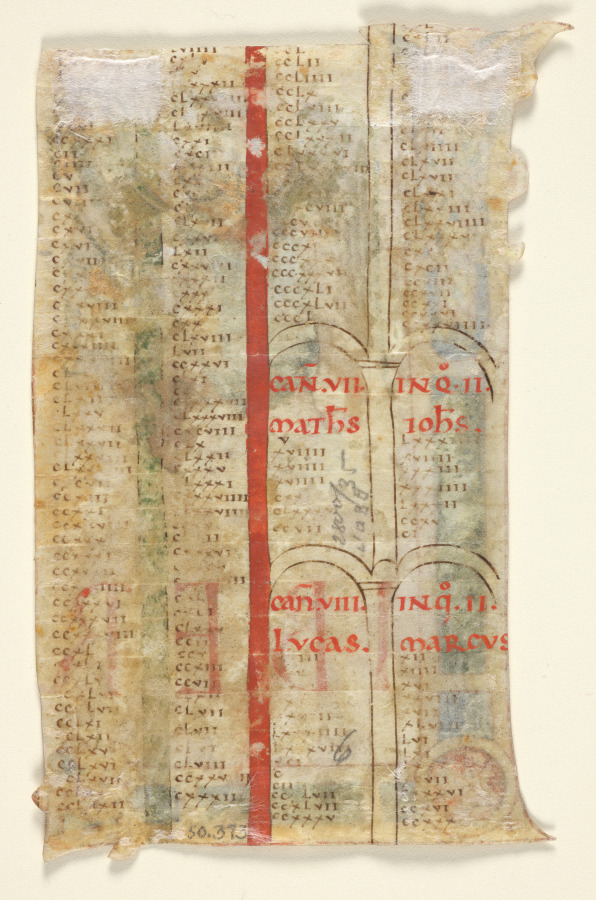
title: Canon Tables (verso)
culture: Italy, Florence, 12th century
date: c. 1125–1150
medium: ink and tempera on vellum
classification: Manuscript